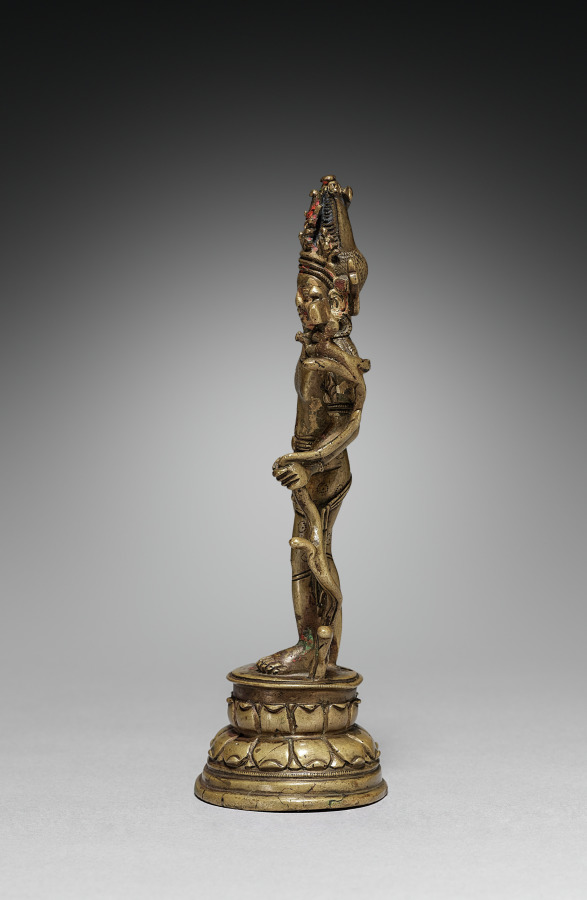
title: Standing Manjusri (Arapacana Form)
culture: India, Pala, 12th-13th century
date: 1100s-1200s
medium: bronze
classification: Sculpture